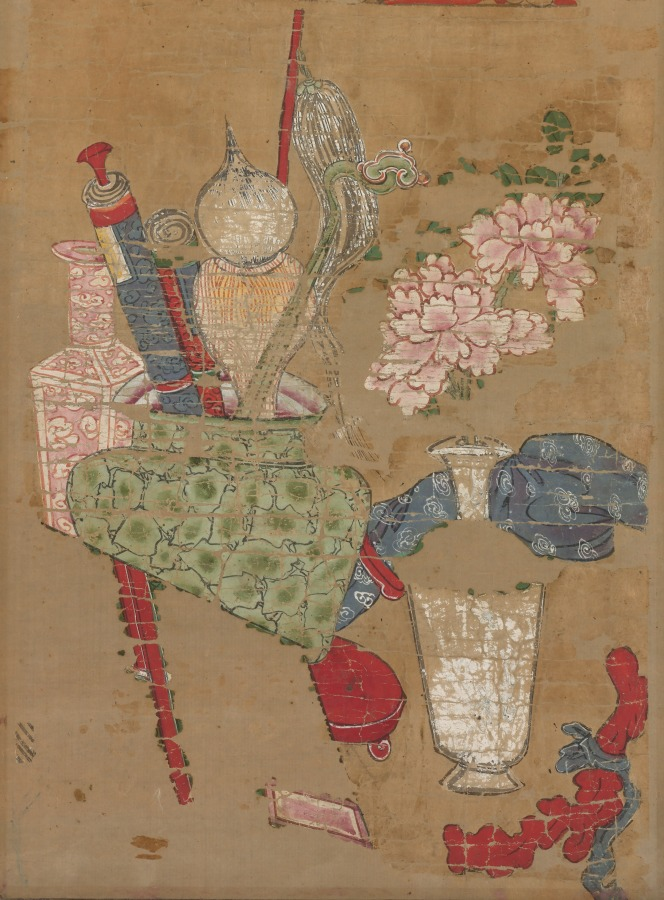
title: Buddhist Panel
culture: China or Korea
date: 1600s–1700s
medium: Hanging scroll; ink and color on paper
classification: Painting